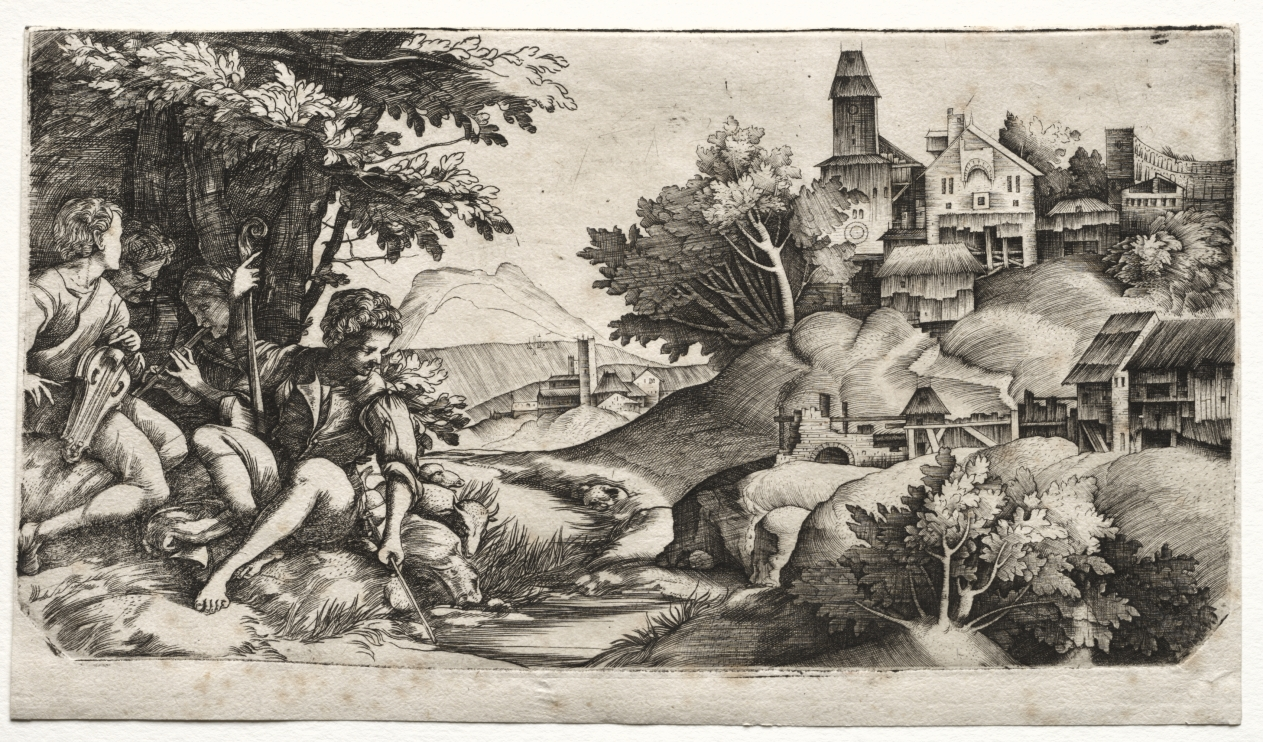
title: Shepherds in a Landscape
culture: Italy, 16th century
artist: Giulio Campagnola (Italian, 1482–1515)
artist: and Domenico Campagnola (Italian, 1500–1564)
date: c. 1517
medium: engraving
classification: Print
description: This depiction of a group of shepherds seated in a landscape is a pictorial manifestation of Arcadia. Two different artists completed the composition—the son (Domenico) of the original artist (Giulio) added the shepherds playing instruments to his father’s landscape— and their distinctive styles can be observed on the right and left sides. Such “pastoral concerts” posed contrasts between urban and pastoral worlds. The spatial layout of this image is ambiguous, offering less a natural experience of landscape than an atmospheric, constructed space full of delicate surfaces, patterns, and lines.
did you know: This composition was begun by Giulio Campagnola, who made the landscape, and finished by his son, Domenico, who completed the figures.